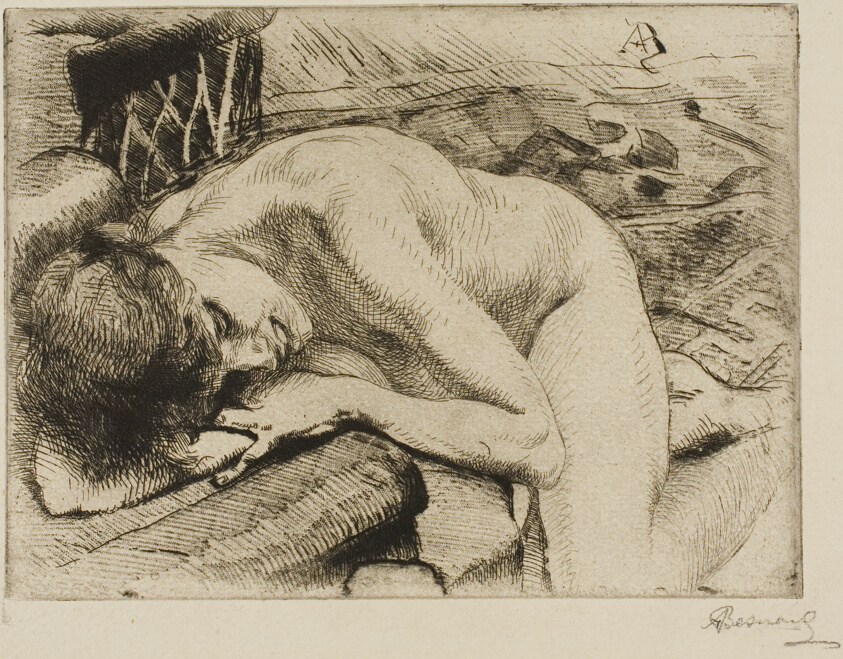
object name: Print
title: The Sleeping Model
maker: Albert Besnard (French, 1849-1934)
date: 1885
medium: Etching with drypoint, aquatint and roulette on ivory wove paper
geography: France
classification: etching; print; prints and drawing